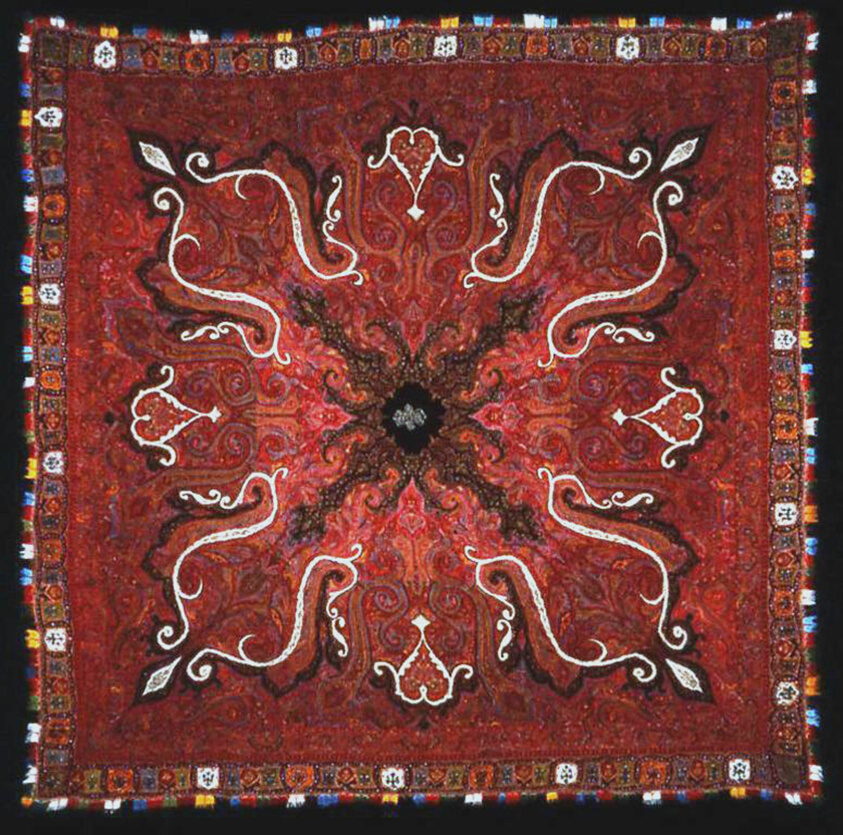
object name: Costume and Accessories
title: Shawl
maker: India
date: 1867/77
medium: Wool, patchwork of double interlocking 2:2 'S' twill tapestry weaves; outer border and "Harlequin" tabs of patchwork in 2:2 'S' twill weaves; embroidered in fly, satin, and stem stitches; laid work and couching; main warp fringe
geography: India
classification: textile; weaving; needlework (visual works); costume